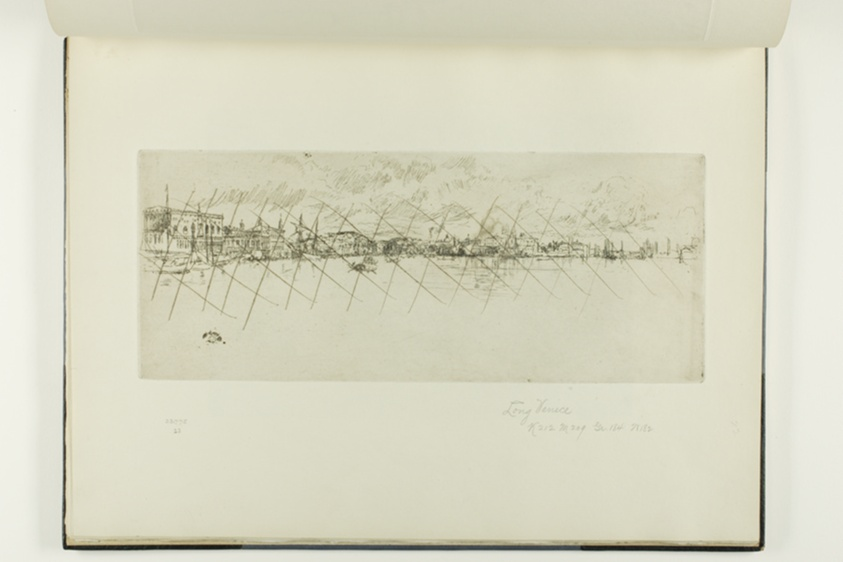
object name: Print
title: Long Venice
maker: James McNeill Whistler (American, 1834-1903)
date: 1879/80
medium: Etching and drypoint with foul biting, with drypoint cancellation, in black ink on ivory laid paper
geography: United States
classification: etching; prints and drawing; print; foul biting; drypoint; book; paper